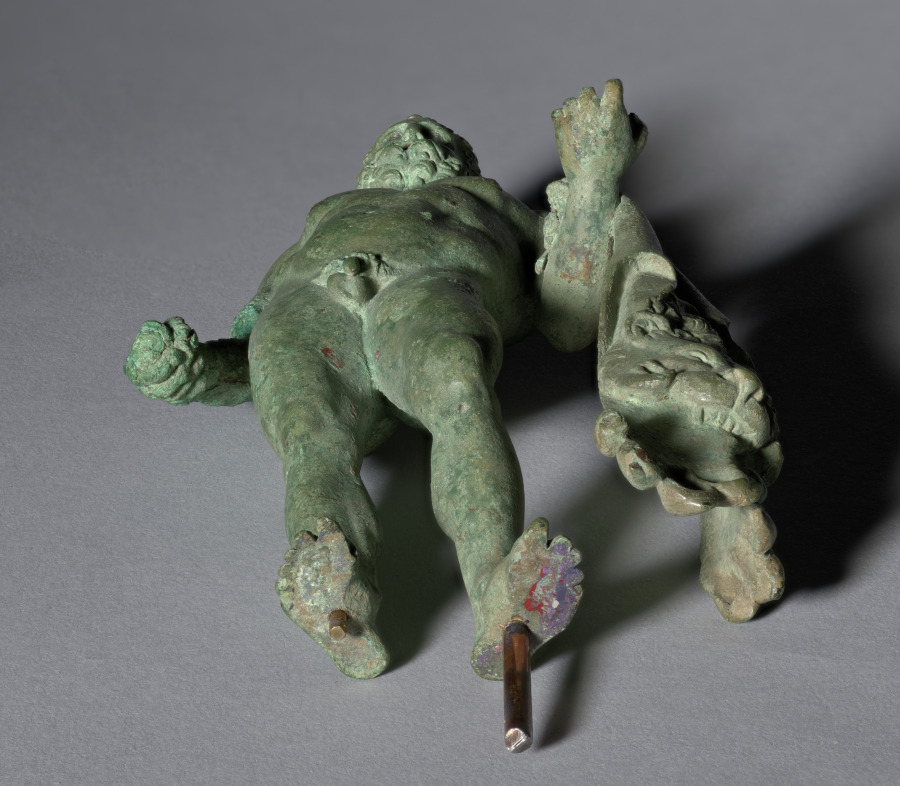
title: Hercules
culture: Italy, Rome, Early Imperial period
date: c. 30 BCE–20 CE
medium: bronze with silver and copper inlays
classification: Sculpture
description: This bronze statuette is a nude figure of the hero Hercules. He stands in a contrapposto pose, with the majority of his weight on one leg. Over his left arm, Hercules holds the skin of the Nemean Lion, having slayed the beast as part of his Twelve Labors and now carrying the pelt as a trophy. Although now mostly lost, Hercules once held his signature wooden club in his right hand. Roman artists often portrayed Hercules as middle-aged, as though greater maturity would increase his power and virility.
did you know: Hercules is the Roman name for the classical hero known in Greek as Herakles.